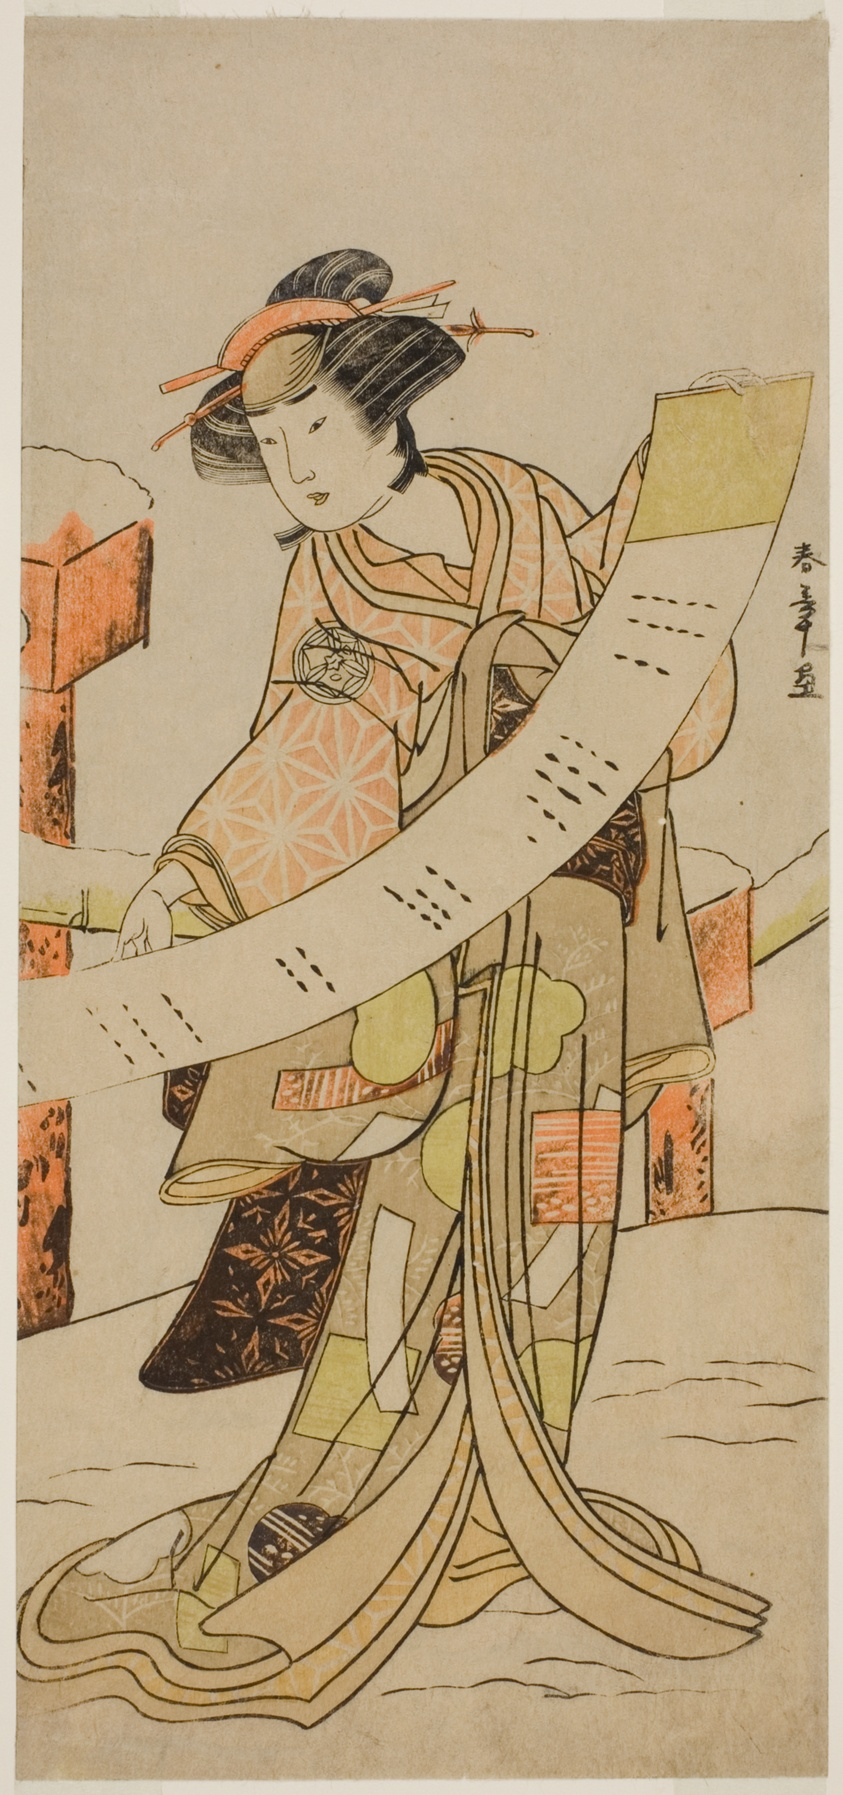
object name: Print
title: The Actor Yamashita Kinsaku II as Naoe in the Play Tsuma Mukae Koshiji no Fumizuki, Performed at the Nakamura Theater in the Eighth Month, 1780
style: Japanese (culture or style)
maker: Katsukawa Shunsho 勝川 春章; Japanese, 1726-1792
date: c. 1780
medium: Color woodblock print; hosoban; right sheet of diptych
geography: Japan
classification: woodblock print; print; asian art